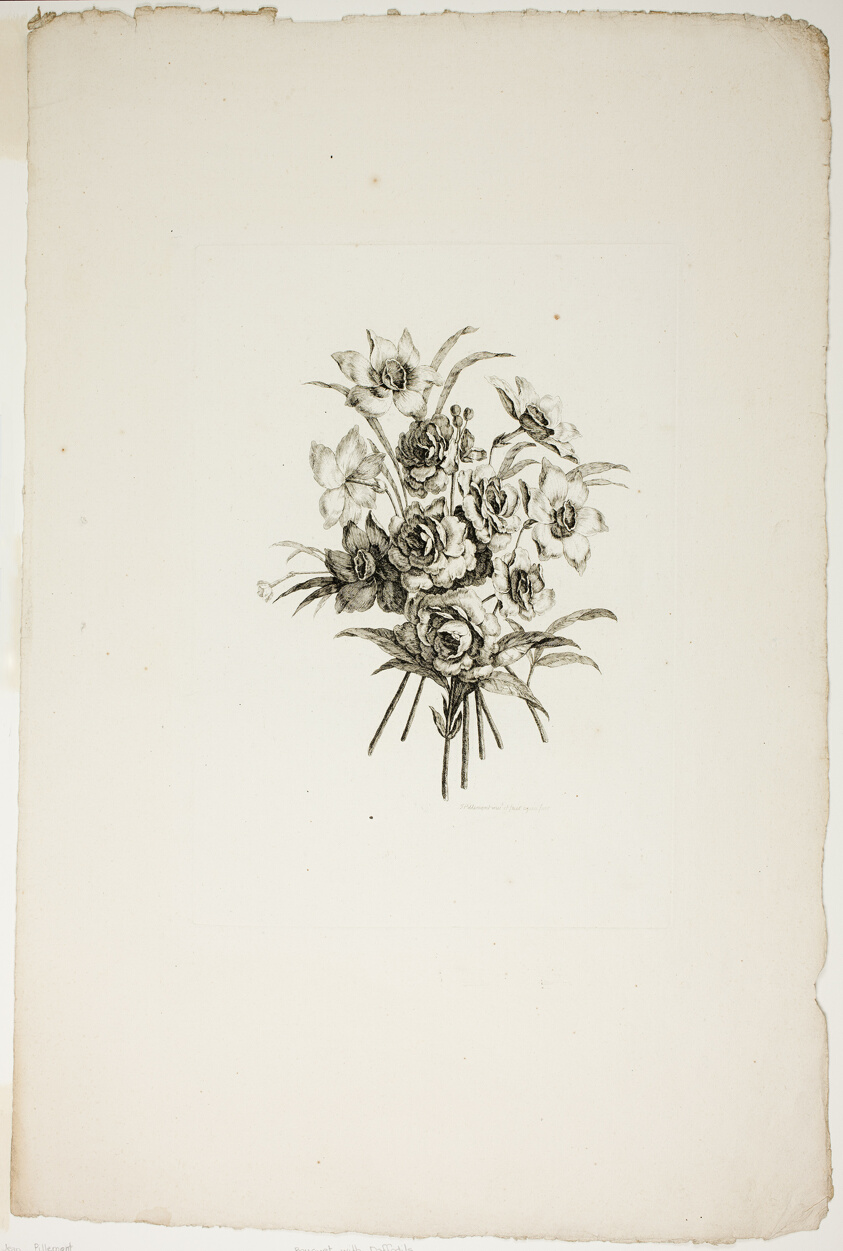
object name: Print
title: Bouquet with Daffodils, from Collection of Different Bouquets of Flowers, Invented and Drawn by Jean Pillement and Engraved by P. C. Canot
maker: Pierre-Charles Canot (French, 1710-1777); after Jean-Baptiste Pillement (French, 1728-1808); published by Charles Leviez (French, 1708-1778)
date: published July 4, 1760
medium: Etching on ivory laid paper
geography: France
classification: etching; print; prints and drawing